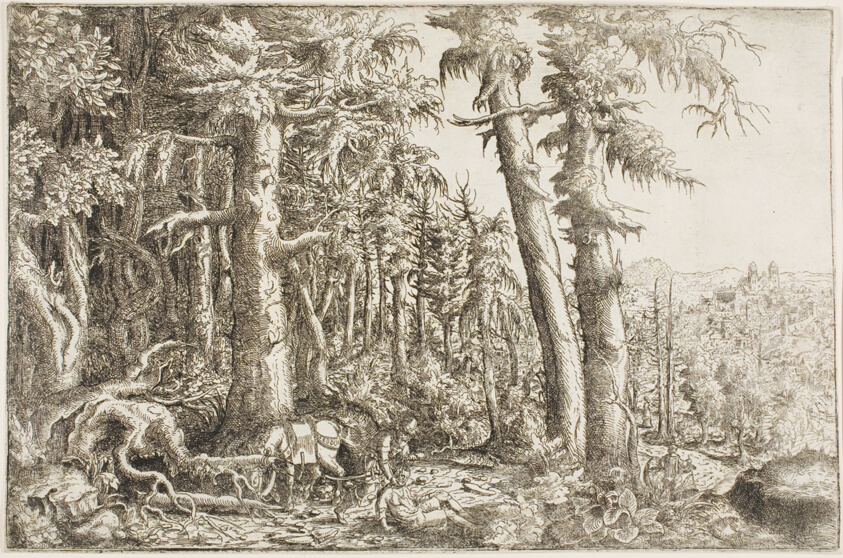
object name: Print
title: The Good Samaritan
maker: Hanns Lautensack (German, 1524-1560/66)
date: 1544/66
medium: Etching on paper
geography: Germany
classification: etching; print; prints and drawing